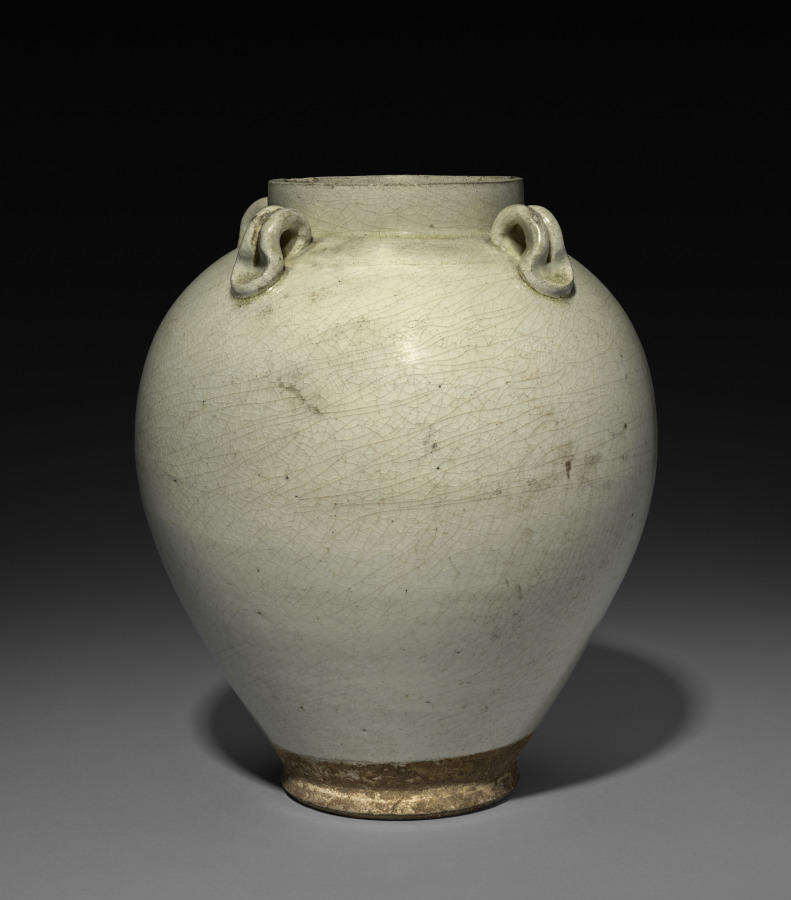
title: Jar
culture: China, Tang dynasty (618-907)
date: mid-600s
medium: glazed stoneware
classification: Ceramic